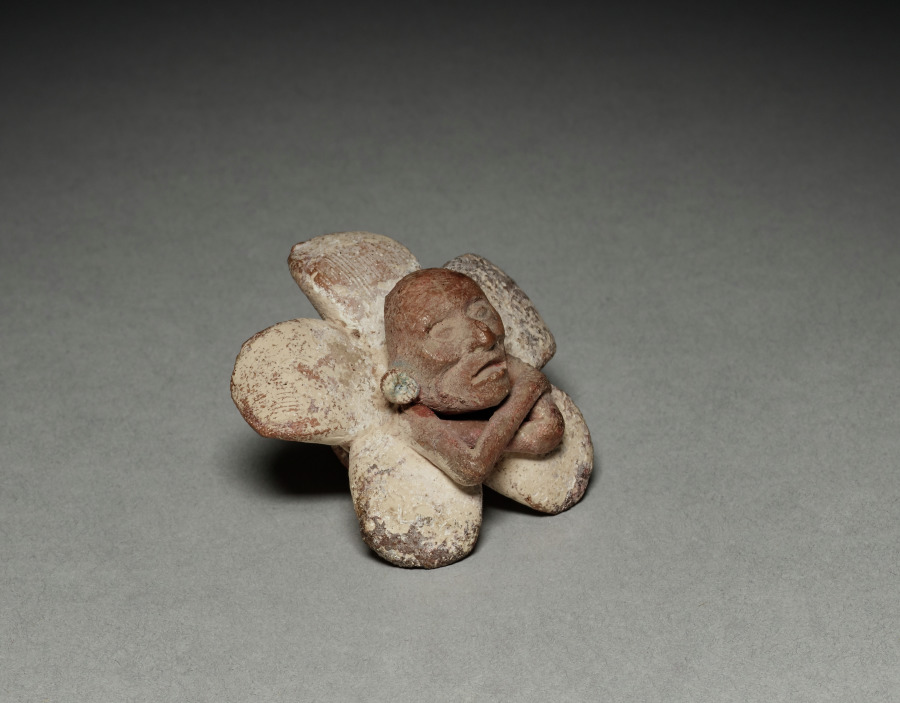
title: Figure in Flower Ornament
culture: Mexico, Yucatán, Jaina Island region, Campeche, Maya style (250-900)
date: 500–900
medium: earthenware with slip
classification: Jewelry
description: Figures within flowers are one of the most enchanting themes of the Maya ceramic art of Jaina, an island off the western Yucatán coast. The figures, usually males who cross their arms over their bodies, are either radiantly youthful or aged (as here), suggesting a relationship to the life cycle.